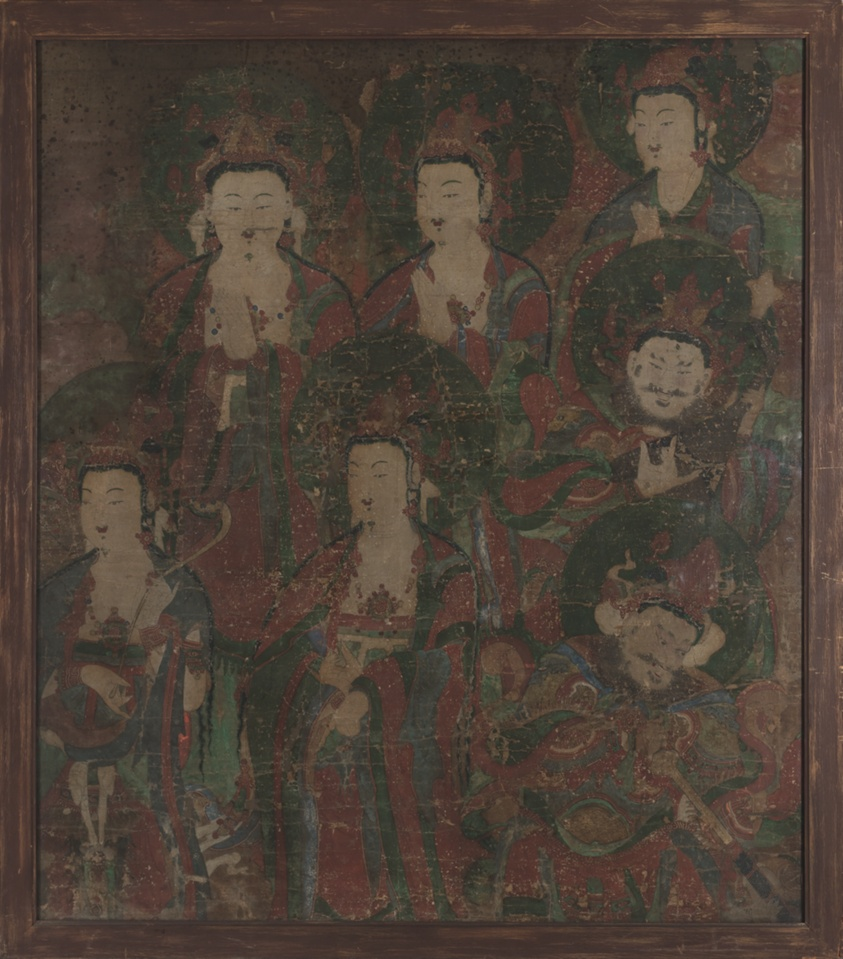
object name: Painting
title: Korean Buddhist Painting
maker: Korea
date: late 19th-early 20th century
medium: Ink and color on hemp cloth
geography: Korea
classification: fresco; painting; asian art